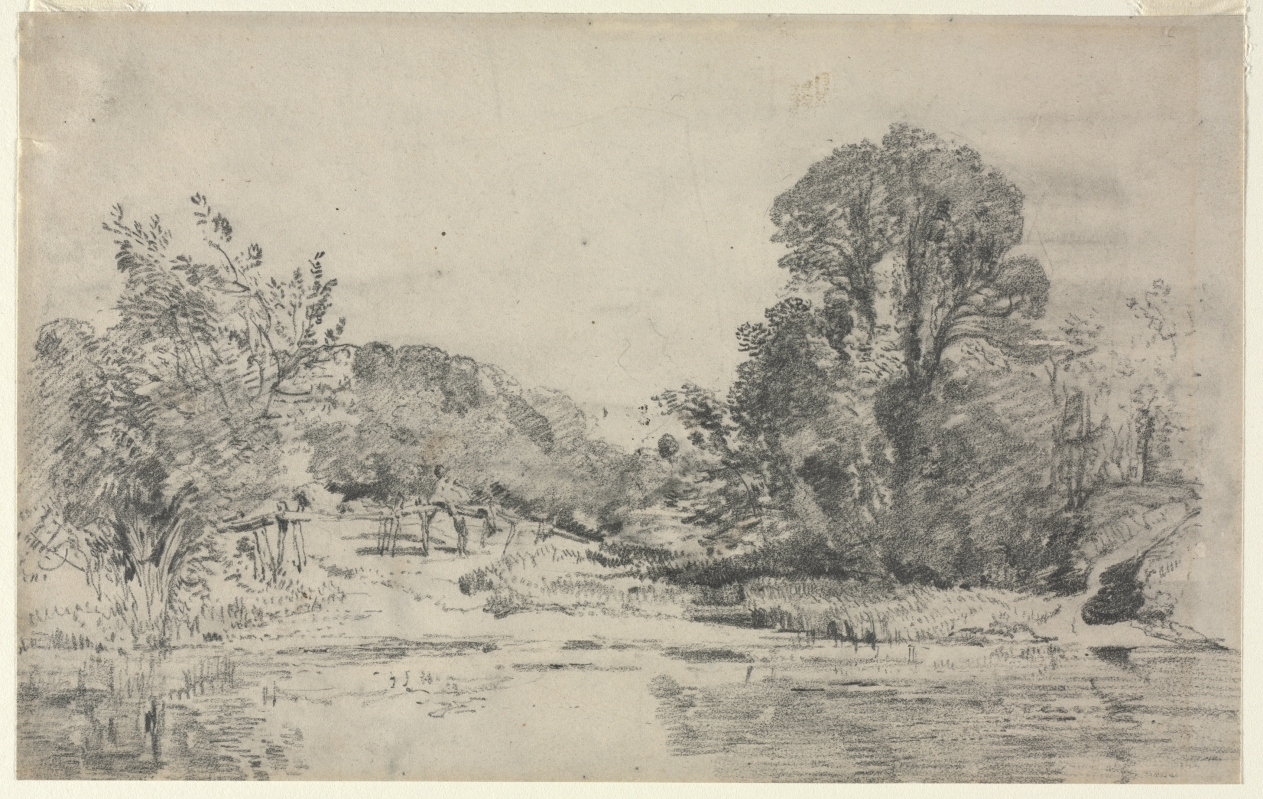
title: Landscape with Trees Surrounding a Pond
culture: England, 19th century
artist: John Constable (British, 1776–1837)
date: c. 1800–37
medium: graphite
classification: Drawing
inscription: Watermark: 1811